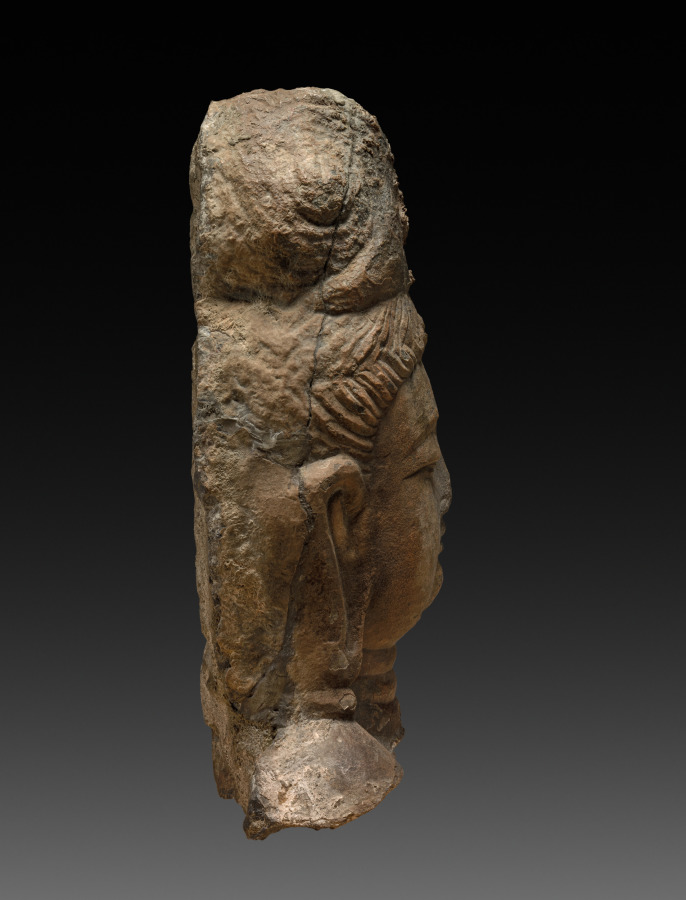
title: Head of Bodhisattva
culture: China, from Lung-mên, Tang dynasty (618-907)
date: 618–907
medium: dark gray limestone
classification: Sculpture